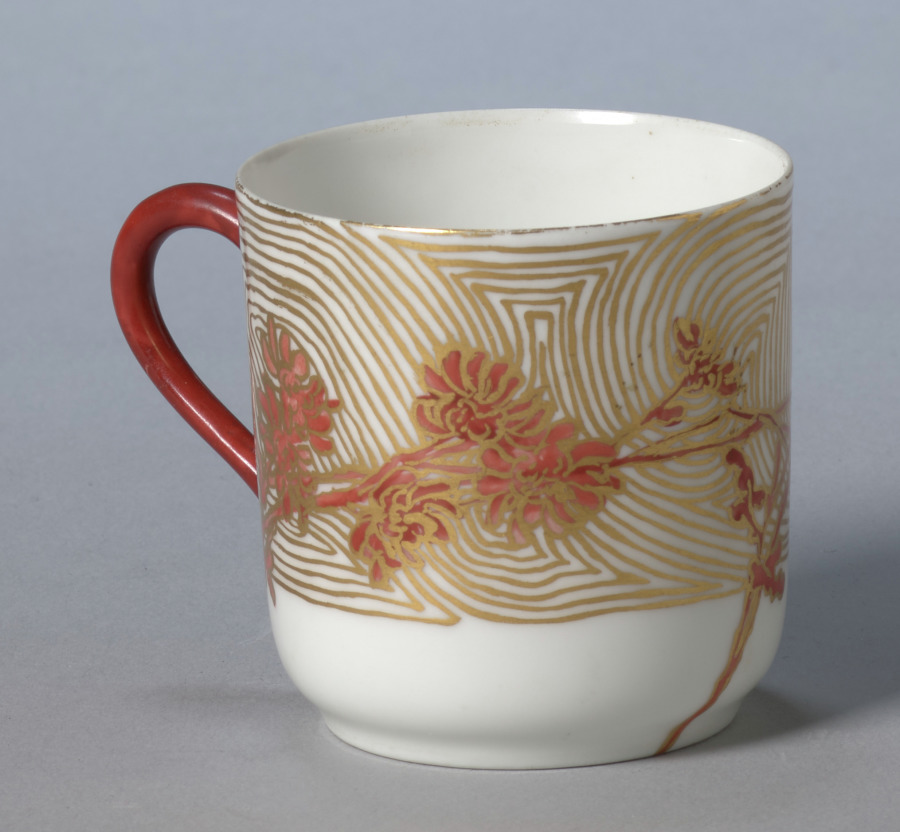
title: Cup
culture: America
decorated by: M. Louise McLaughlin (American, 1847–1939)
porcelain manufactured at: Haviland & Co. (French)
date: 1888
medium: porcelain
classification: Ceramic